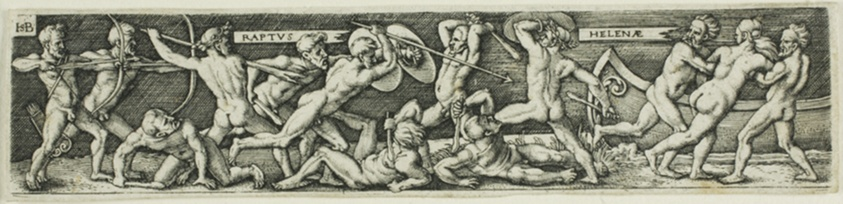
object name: Print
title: The Abduction of Helen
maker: Sebald Beham (German, 1500-1550); after Barthel Beham (German, 1502-1540)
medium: Engraving in black on ivory laid paper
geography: Germany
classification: engraving; print; prints and drawing